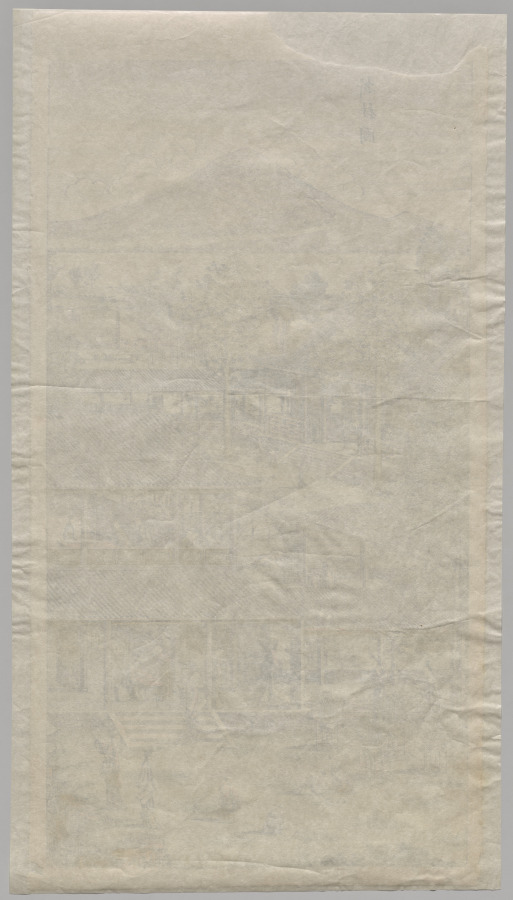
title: Gathering Osmanthus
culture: China, Qing dynasty (1644–1911), Qianlong reign (1736–95)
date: 1736–95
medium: Polychrome woodblock print; ink and color on paper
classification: Print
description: In the 1600s, printing flourished in such Jiangnan cities as Nanjing, Suzhou, Hangzhou, and Huizhou, evolving from privately enjoyed illustrated books printed in color to more commercialized single-sheet color prints that were hung on walls and became part of the rich urban visual culture.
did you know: Woodblock printing in color reached a height in China in the 1600s to 1700s. The prints were executed by means of sets of separate blocks, each carved to print a different color.